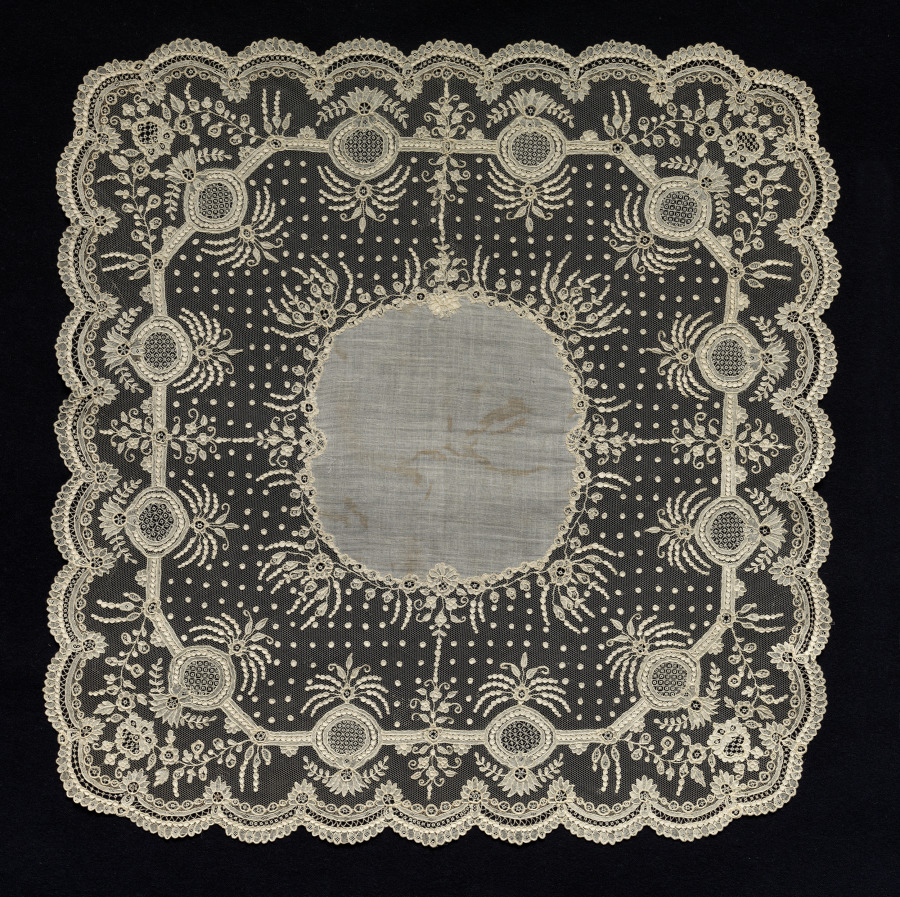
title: Lace Handkerchief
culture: France, Alençon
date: 1800–1840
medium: Plain weave linen center with needle lace (Point d'Alençon) border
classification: Lace